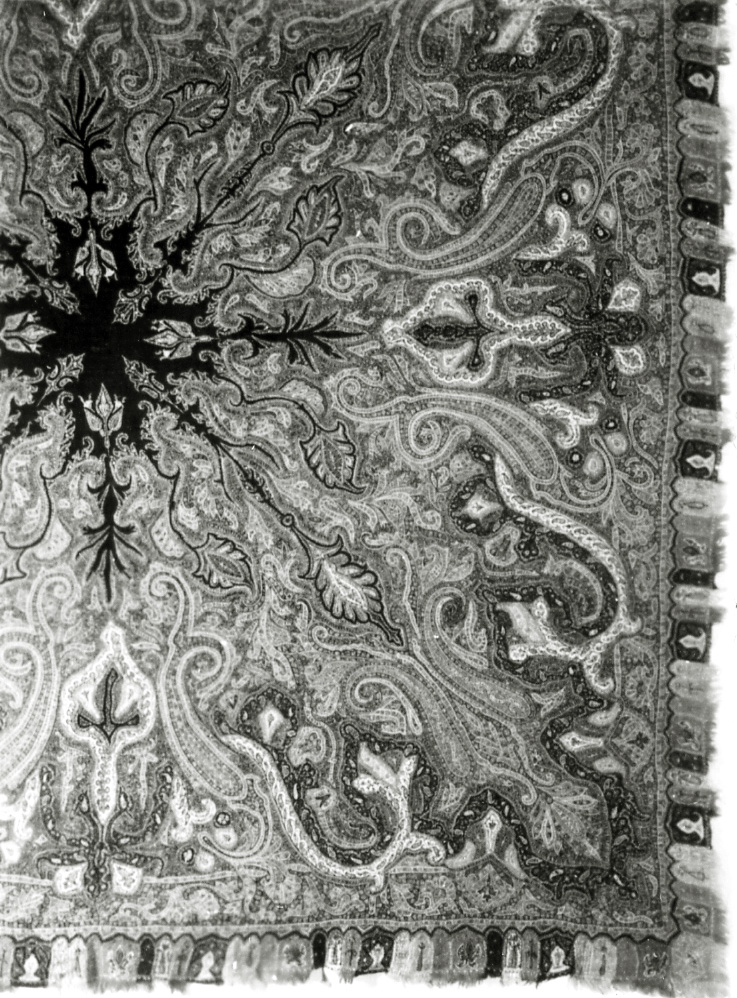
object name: Costume and Accessories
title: Shawl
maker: India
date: 1850/75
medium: Wool; embroidered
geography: India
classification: textile; embroidery; weaving; costume; dress (garment); clothing